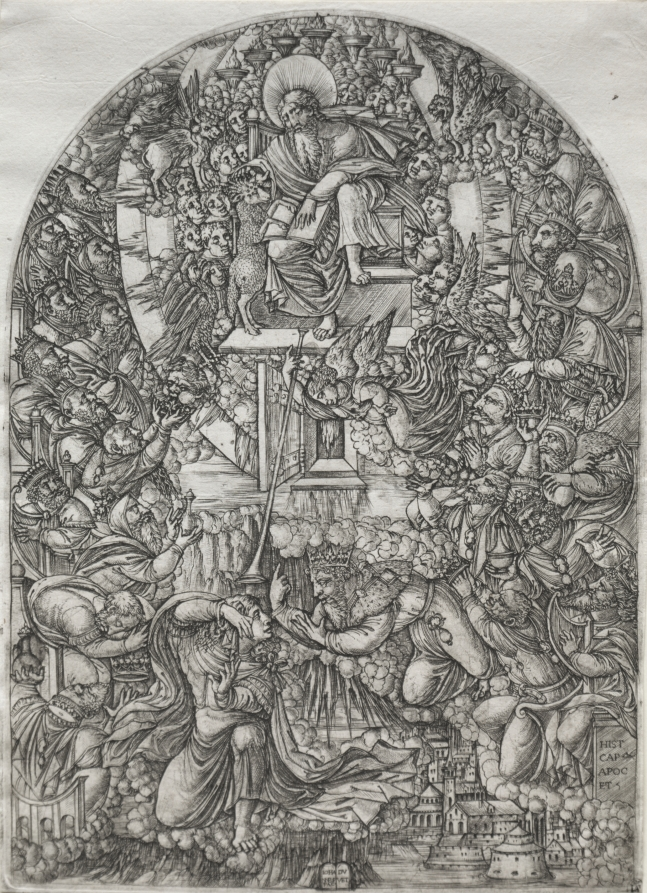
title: The Apocalpse: St. John Summoned to Heaven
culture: France, 16th century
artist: Jean Duvet (French, 1485–1561)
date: 1555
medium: engraving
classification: Print